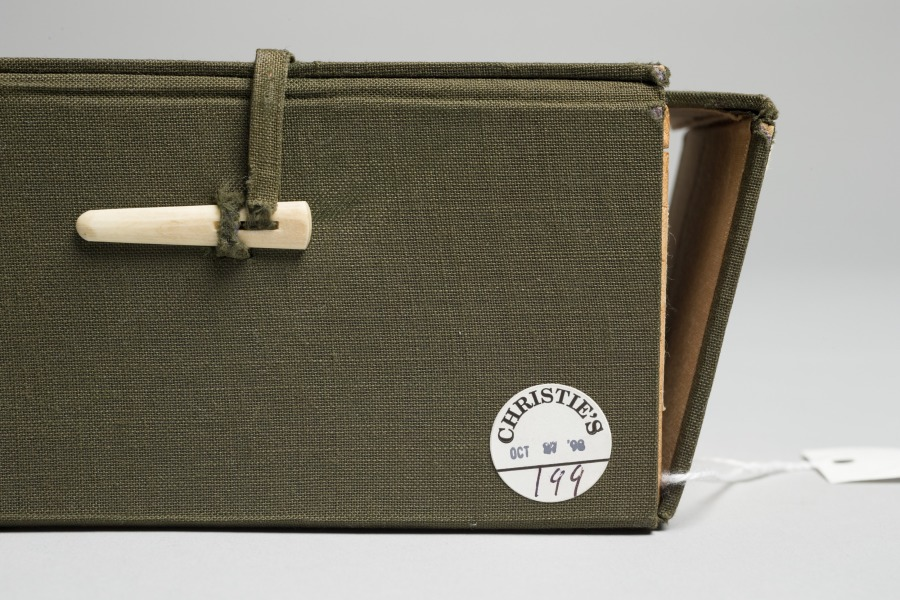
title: Courtesan Seated on a Bench Enjoying the Evening Cool in Summer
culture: Japan, Edo period (1615–1868)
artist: Kamigaki Hōryū (Japanese, dates unknown)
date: 1615–1868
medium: hanging scroll, ink and color on silk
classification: Painting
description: In a pensive pose with her chin resting in her hand, a courtesan is seated on a wooden bench that extends diagonally across the lower half of the scroll. Her open robe suggests that it is a warm evening-perhaps late summer or early fall, as indicated by the grapevine pattern on her kimono. The floral patterns in the composition hint at the seasons: the plum blossom on the fan for spring; grape pattern on the robe for late summer; and chrysanthemum design on the bench indicating autumn. Note also how the grapevine pattern in the painting's mounting mimics the design of her kimono. The overall mood is one of intimacy, created by Hõryþ through the delicate rendering of the courtesan's facial features and hands. In contrast to the other scrolls of beauties nearby, the artist here portrayed his subject with little background, allowing her grace and elegance to carry the picture.